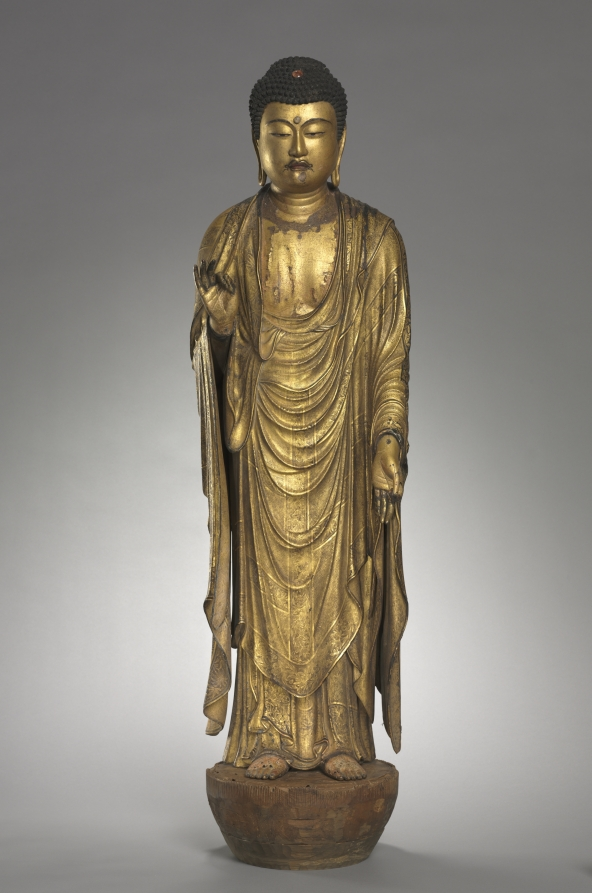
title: Buddha of Infinite Life and Light (Amida Nyorai)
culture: Japan, Kamakura period (1185–1333)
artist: Kōshun (Japanese, active mid-1200s)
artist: assisted by Koshin (Japanese, active mid-1200s)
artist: assisted by Joshun (Japanese, active mid-1200s)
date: 1269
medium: Cypress with lacquer, color, gold, cut gold, rock-crystal inlaid eyes, and quartz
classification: Sculpture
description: This ornate Buddha Amida stands in a posture of welcome, greeting the dying who will accompany him back to his Pure Land. Documents inserted into the sculpture’s hollow core around the time of its creation include a copy of the sacred text Amida Sutra, a register of donors who desired to be joined together in generating karmic merit (kechien) through the creation and dedication of the sculpture, and a record asserting that the image was completed over the course of 33 days in 1269 at Shitennōji Temple in Osaka.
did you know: The lead sculptor was Kōshun, who had been granted the lofty title “Bridge of the Law.”